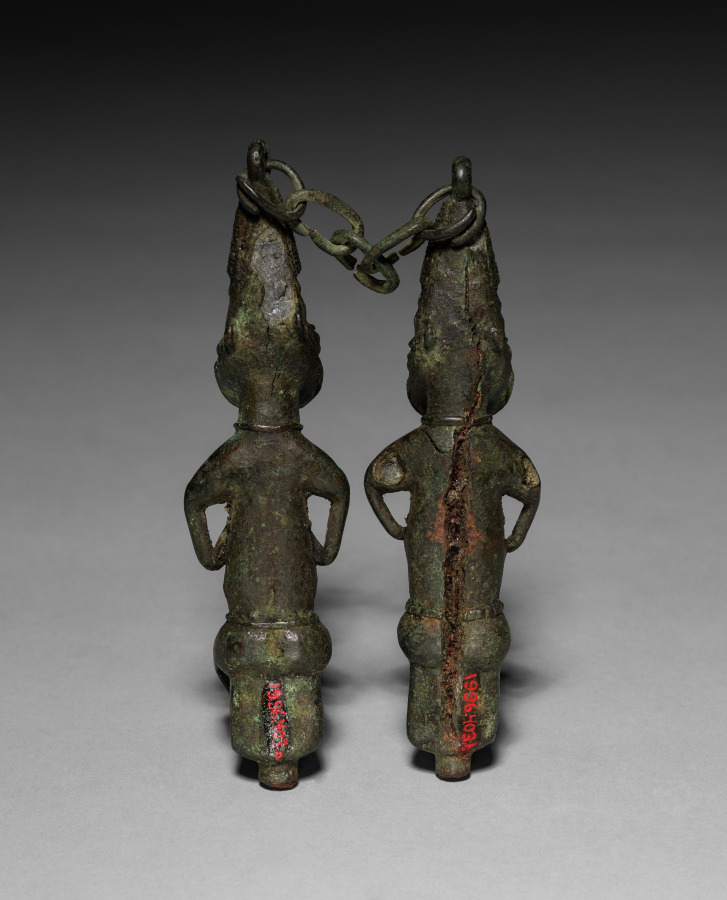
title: Pair of Ritual Staffs (ẹdan Ògbóni)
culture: Africa, West Africa, Nigeria, Yorùbá-style maker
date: possibly 1800s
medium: Copper alloy and iron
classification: Sculpture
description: The chain connecting these two figures allows them to be worn in public by a member of the Ògbóni or Òṣùgbó association as authority emblems. The male on the right gives the association’s typical salute by clasping his left fist on the right one, while the female on the left holds her breasts as a sign of welcome and generosity. The use of copper alloy and iron expresses Ògbóni/Òṣùgbó's concerns with longevity and durability.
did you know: Imagine how this would look when its owner wore it; the chain would go around the back of the neck and the figures would rest on their chest.